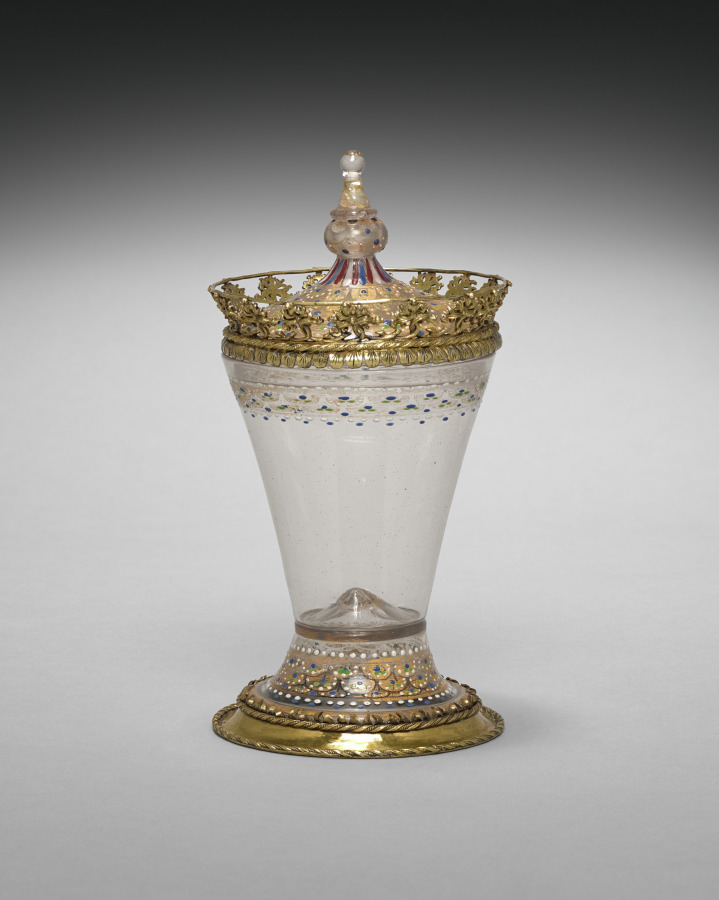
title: Covered Beaker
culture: Italy, Venice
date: c. 1490–1500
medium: glass, enameled and gilded, gilt-silver mounts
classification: Glass